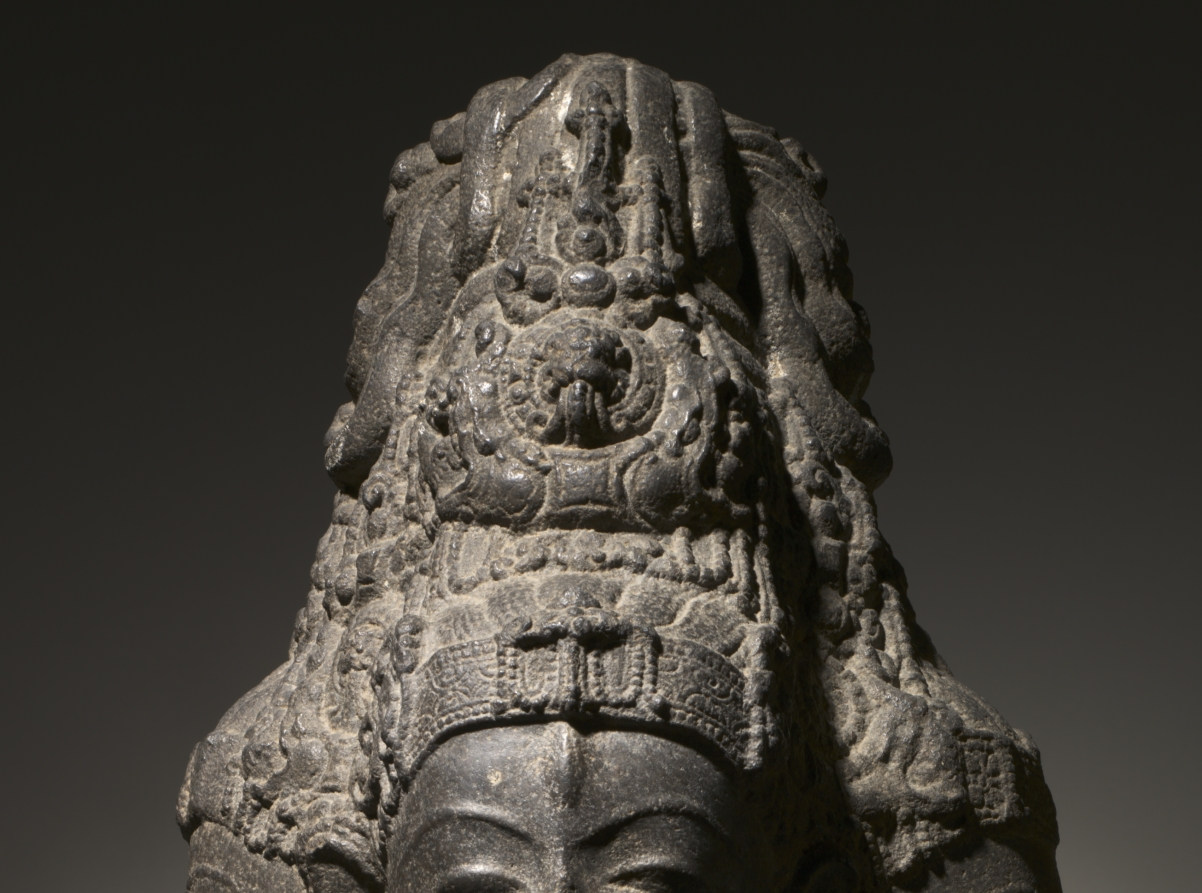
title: Brahma-Shiva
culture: South India, Tamil Nadu, Chola dynasty, late 10th - early 11th century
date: late 900s–1000s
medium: granite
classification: Sculpture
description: In the Hindu pantheon Brahma is in charge of carrying out the work of creation. In this tour-de-force of South Indian temple sculpture, he is in a special regal aspect, with the only elements of his typical priestly appearance being the prayer beads and the matted dreadlocks piled on his head. Four arms connote superhuman power, and four heads convey the idea that his creative activities spread in all four directions. His upper right hand enjoins freedom from fear, and the lower holds a lotus bud associated with birth and the process of creation. His lowered left hand is held in the gift-giving gesture, suggestive of the gift of creation he will bestow upon the world.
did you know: The back of the sculpture retains the original textured surface from a pointed chisel, suggesting it was in a niche or near a wall, protected from worshippers’ touches.